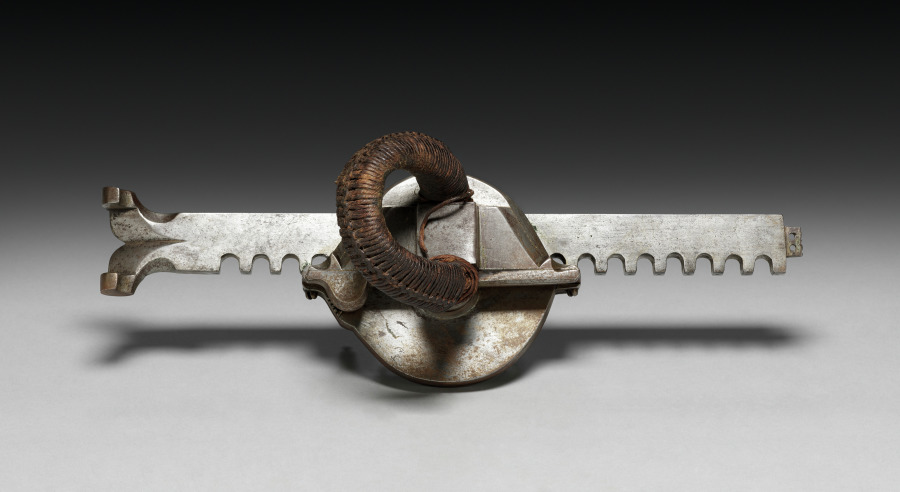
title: Cranequin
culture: Germany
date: 1600s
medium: steel, etched; flax cord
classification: Arms and Armor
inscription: inscribed 1612 (not original); maker's mark (indecipherable)